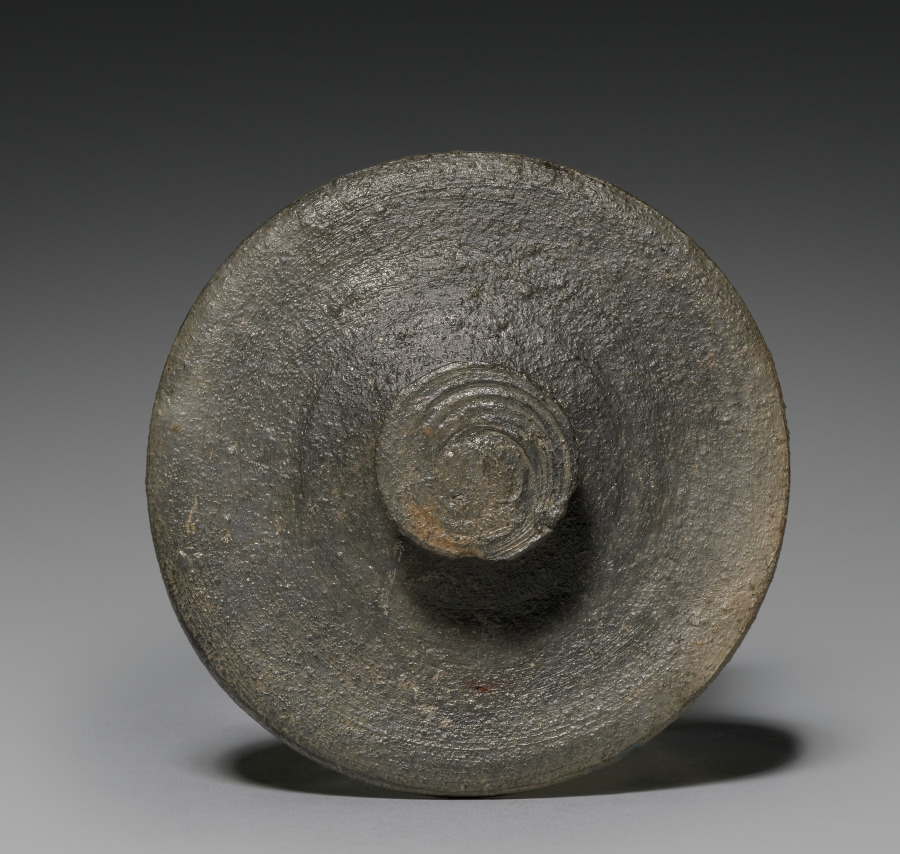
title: Pot with Cover (lid)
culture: Rhenish (Cologne), Gallo-Roman, 2nd century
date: 100–200 CE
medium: tan ware with gray and some brown burnished slip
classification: Ceramic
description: The work of Roman potters is very different from that of their Greek predecessors. Greek clay had allowed potters to throw thin-walled ceramics. Slips (paint) made from this clay had permitted painters to draw complicated scenes and figures with infinite care. As the Roman empire grew to include Germany and Britain, local clays found there were better for producing heavier pottery with three-dimensional decoration like this vase here. These jars—decorated with a human face (1992.125), animals (1992.126), a feather pattern (1992.183), a wheat pattern (1992.124), and vertical ribs (1992.127). were probably filled with foods or liquids and given either as gifts to an elaborate burial or as offerings to a god's shrine.